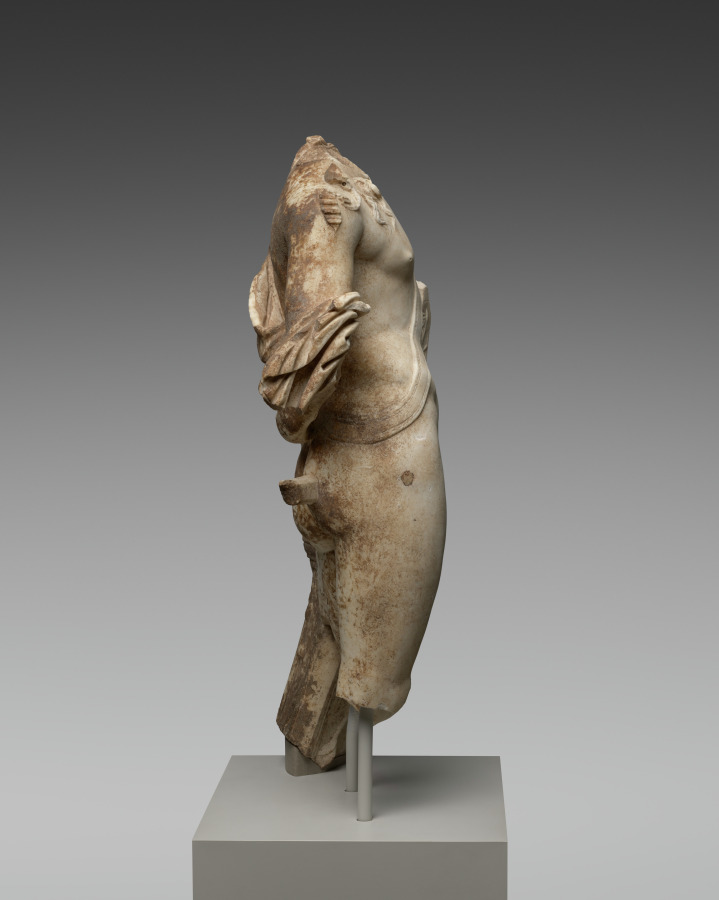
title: Torso of Apollo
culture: Italy, Roman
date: c. 100–200 CE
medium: marble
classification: Sculpture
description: This ancient statue depicts the Greek god Apollo, identified by his youthful body and the fragmentary remains of his kithara, a type of lyre (or stringed instrument) used by poets and musicians in ancient Greece. Both the kithara, decorated with griffins, and the swan upon which it rests (atop a triangular column), signify Apollo’s roles as the god of music and leader of the Muses. Beloved by the Muses for their song, swans were considered sacred to Apollo because he gave them the gift of prophecy. Swans sing a glorious song before they die, knowing they will soon return to Apollo to be reborn.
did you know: Apollo received his lyre from Hermes, who invented it.